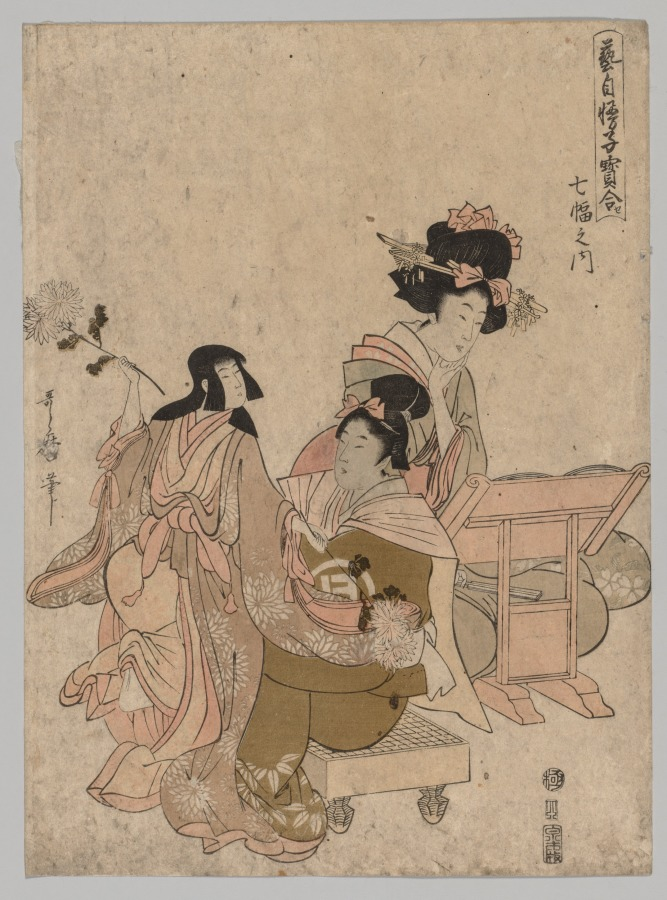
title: Bunraku Puppetry from the series Competition of Precious Children Proud of their Arts, Among Seven Scrolls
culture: Japan, Edo period (1615–1868)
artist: Kitagawa Utamaro II (Japanese, d. 1831?)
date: 1805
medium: color woodblock print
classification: Print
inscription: Signature: Utamaro fude